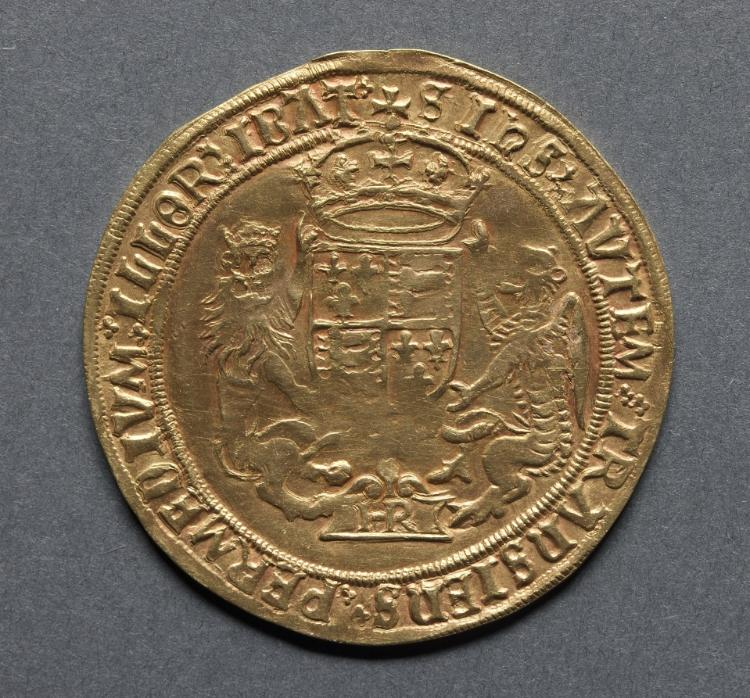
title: Sovereign (reverse)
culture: England, Henry VIII, 1509-1547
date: 1544–1547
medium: gold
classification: Coins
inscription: IHS. AVTEM TRANSIENS PER MEDIVM ILLORVM IBAT